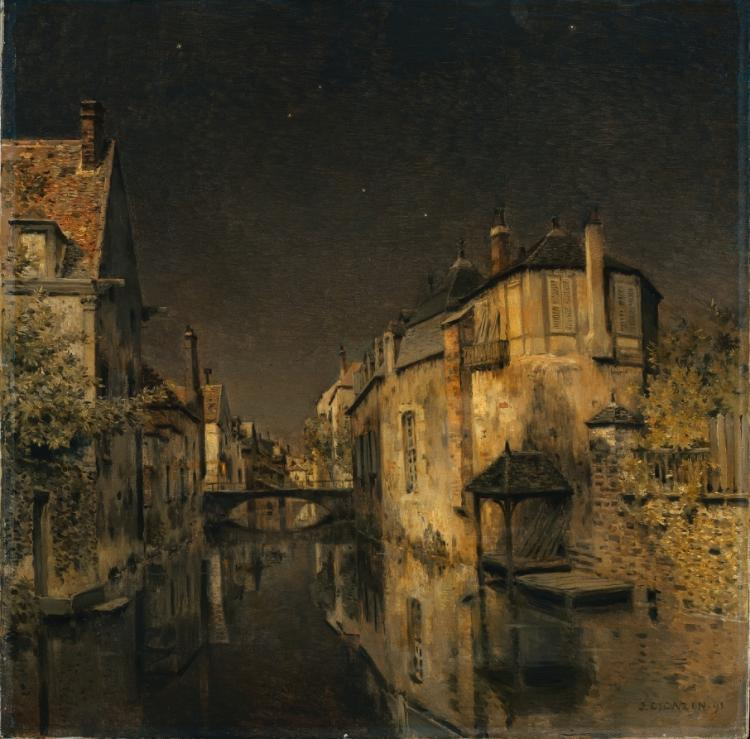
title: Midnight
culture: France, 19th century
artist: Jean-Charles Cazin (French, 1841–1901)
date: 1891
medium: oil on fabric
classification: Painting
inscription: Signed lower right: j. c. cazin. 91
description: This painting depicts Abbeville, a city in northern France famous for its canals and architecture. It lies near the seaport of Boulogne-sur-Mer, Cazin's hometown and where he spent the last decades of his life painting the countryside, beaches, and nearby towns. Cazin specialized in landscapes, often influenced by his knowledge of English and Dutch painters. The title, Midnight, and the image itself suggest silence and stillness—Cazin's hallmarks—but only rarely did he attain this almost surrealistic atmosphere. Cazin was educated in Paris at the famous Ecole Gratuite de Dessins (Free School of Drawing), an innovative and unorthodox institution teaching drawing from memory. He studied there with fellow artists Henri Fantin-Latour (1836–1904), Auguste Rodin (1840–1917), and Alphonse Legros (1837–1911). They all shared an interest in Symbolism—the movement that sees symbols in reality and perceives reality through symbols.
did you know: Cazin preferred to paint in his studio using memory techniques learned in his artistic training which he later passed on to his own students.